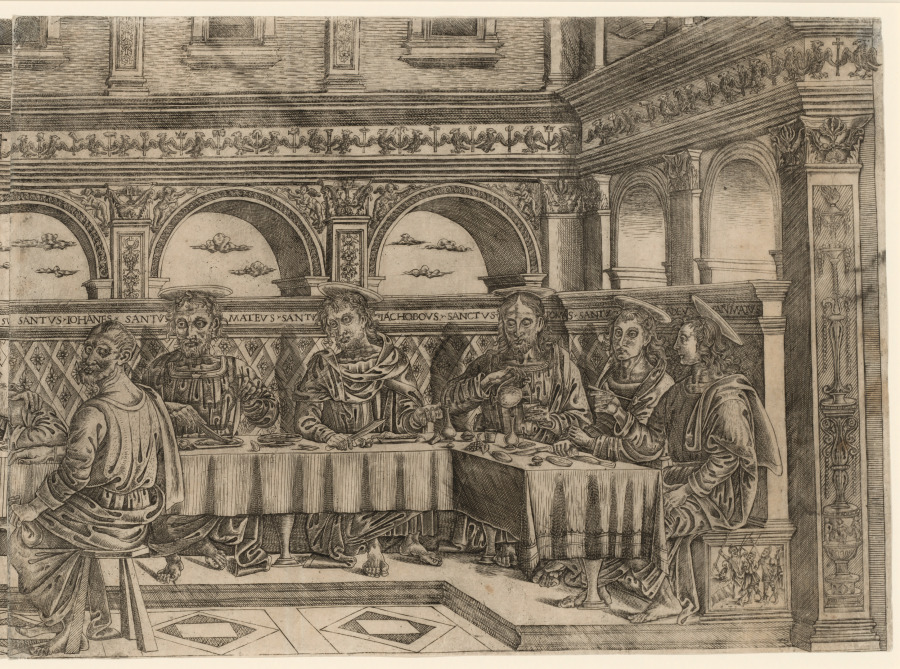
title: The Last Supper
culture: Italy, 16th century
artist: Lucantonio degli Uberti (Italian)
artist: after Perugino (Italian, c. 1450/55–1523)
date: c. 1500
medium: engraving on two sheets printed from two plates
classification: Print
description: Because large prints were often displayed on a wall, they were susceptible to damage and often have not survived. This large print of the Last Supper, however, is in excellent condition. It was engraved on two plates and printed on two separate sheets of paper. The composition is believed to be a fairly close copy of a fresco by Perugino in the convent of San Onofrio in Florence, around 1495. The scene is set within an arched interior embellished by a frieze of eagles and by half pilasters with floral decorations and putti. Fluffy clouds are visible beyond the archways. Christ and the apostles are on a bench arranged behind the table. Judas, instead, sits on a stool in the middle of the room, looking over his shoulder towards the viewer. The engraver included two reliefs at both ends of the bench. The panel on the right shows Judas with four soldiers, while the one on the left features a knight, a squire, and a banner. On it, the letters LVC . . . TNO have been interpreted as the artist's signature.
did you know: This print is the only known impression of the entire composition. A copy with only the right side is preserved today at the British Museum in London.